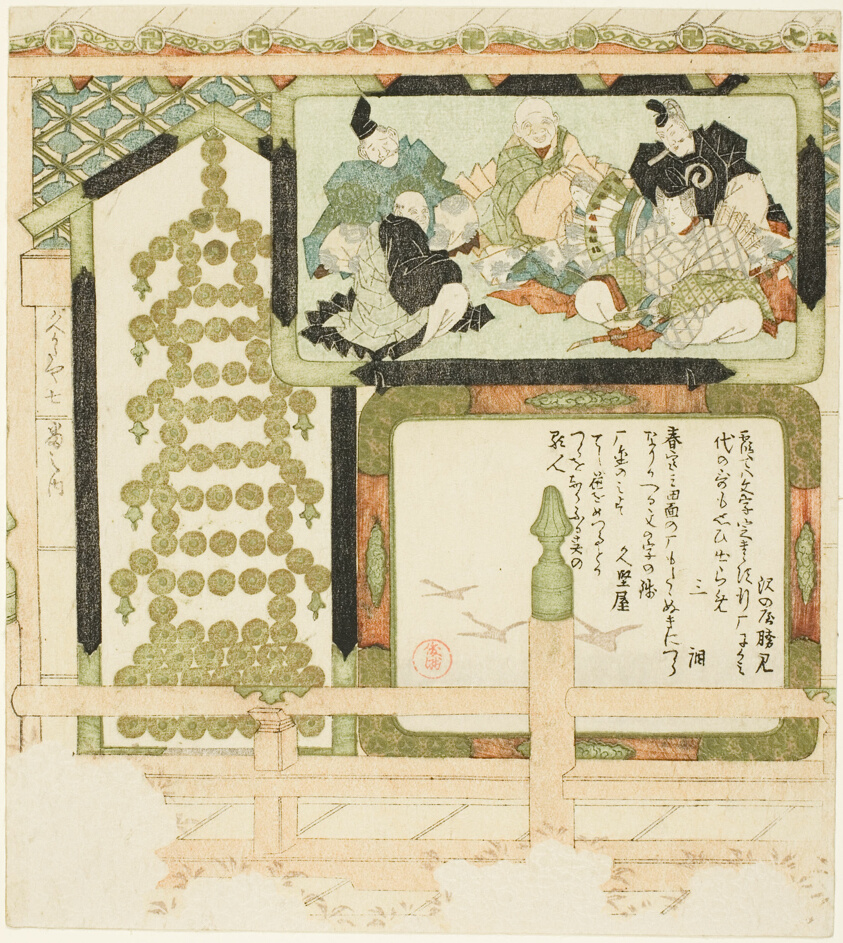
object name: Print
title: No. 7: Votive paintings of Six Immortal poets, flying geese, and a pagoda made of coins, from the series "Seven Pictures for the Hisakataya (Hisakataya shichiban no uchi)"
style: Japanese (culture or style)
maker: Kubo Shunman (Japanese, 1757–1820)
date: c. 1810's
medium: Color woodblock print; shikishiban, surimono with metallic pigments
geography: Japan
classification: woodblock print; print; asian art